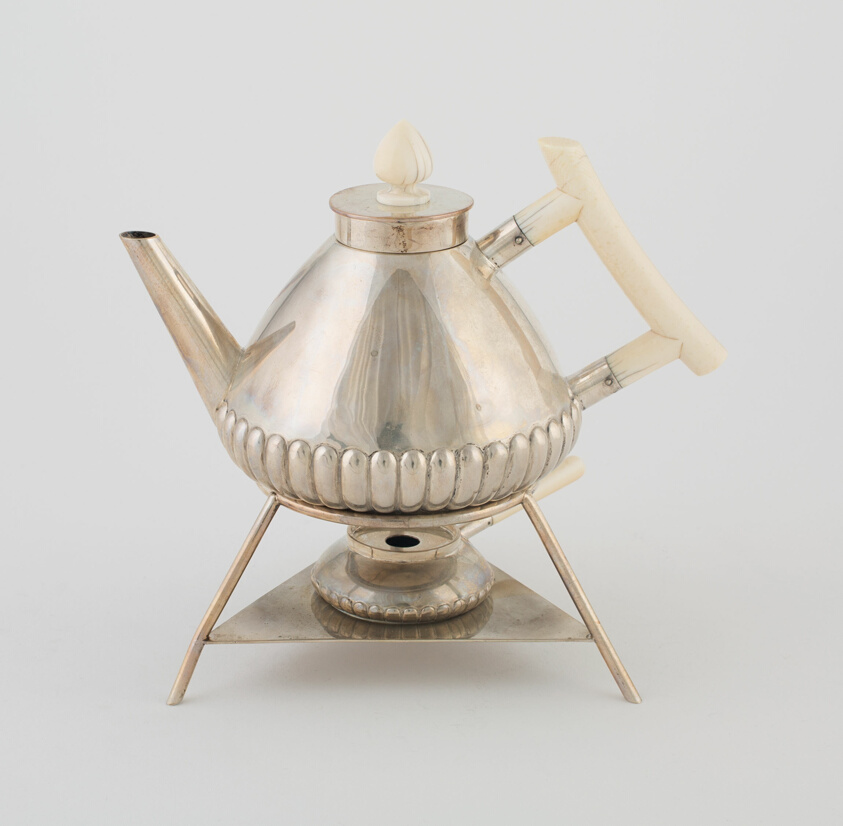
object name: Metalwork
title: Teapot on Stand with Rechaud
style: Japanism, japonism, design reform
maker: Probably designed by Christopher Dresser (English, born Scotland, 1834-1904); Made by Gebrüder Frank (Vienna, Austria, active c. 1900-1901)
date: 1875/90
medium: Silver and ivory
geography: Vienna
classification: teapot; silver; metalwork; european decorative arts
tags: tea